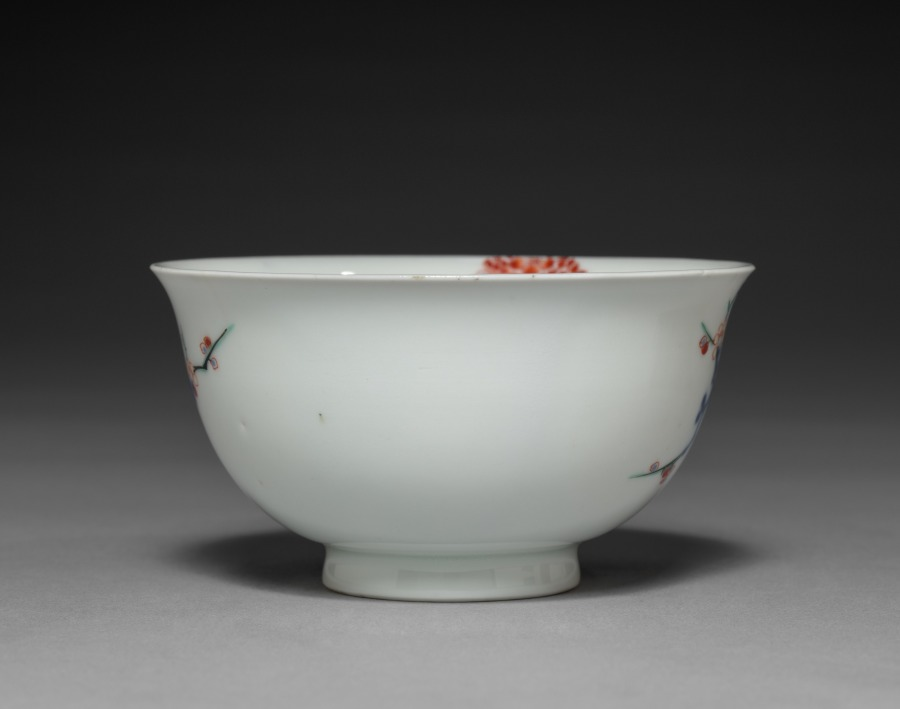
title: Cup with Plum and Rock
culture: Japan, Edo period (1615–1868)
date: 1700s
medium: porcelain with underglaze blue and overglaze enamel decoration (Hizen ware, Ko-Kutani type)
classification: Ceramic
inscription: 福